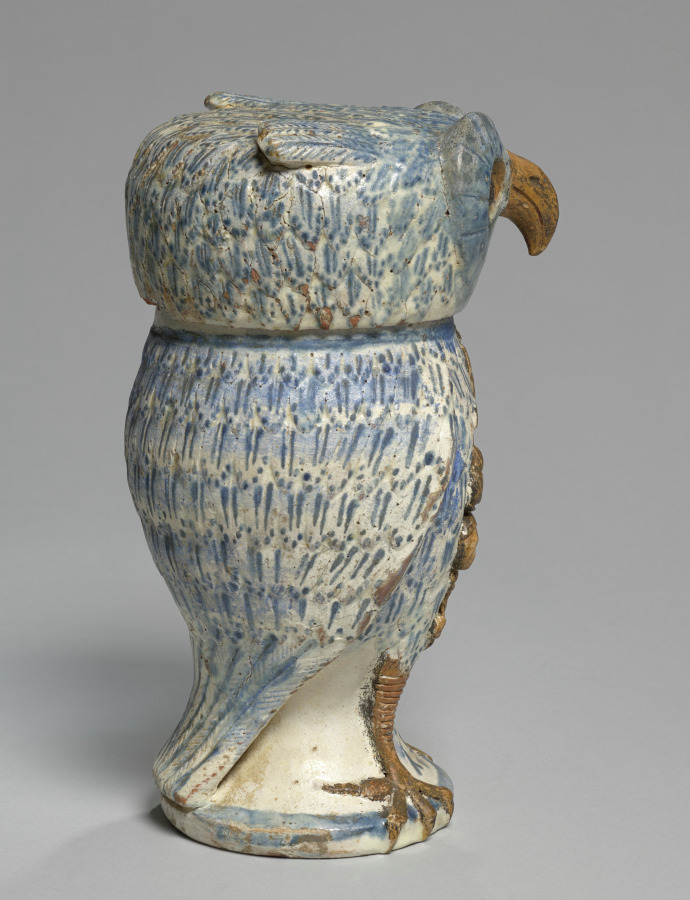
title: Owl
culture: Southern Germany, 16th century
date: 1540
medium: faience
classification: Ceramic